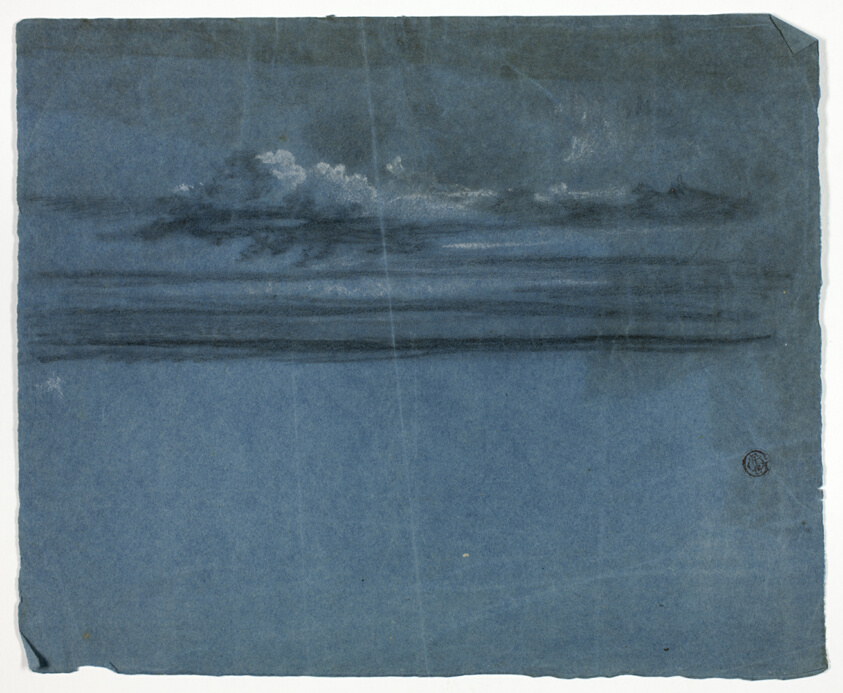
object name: Drawing and Watercolor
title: Study of Clouds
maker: Style of William Turner; English, 1789-1862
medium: Charcoal, with stumping, heightened with white chalk, on blue wove paper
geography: England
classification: charcoal; drawings (visual works); prints and drawing